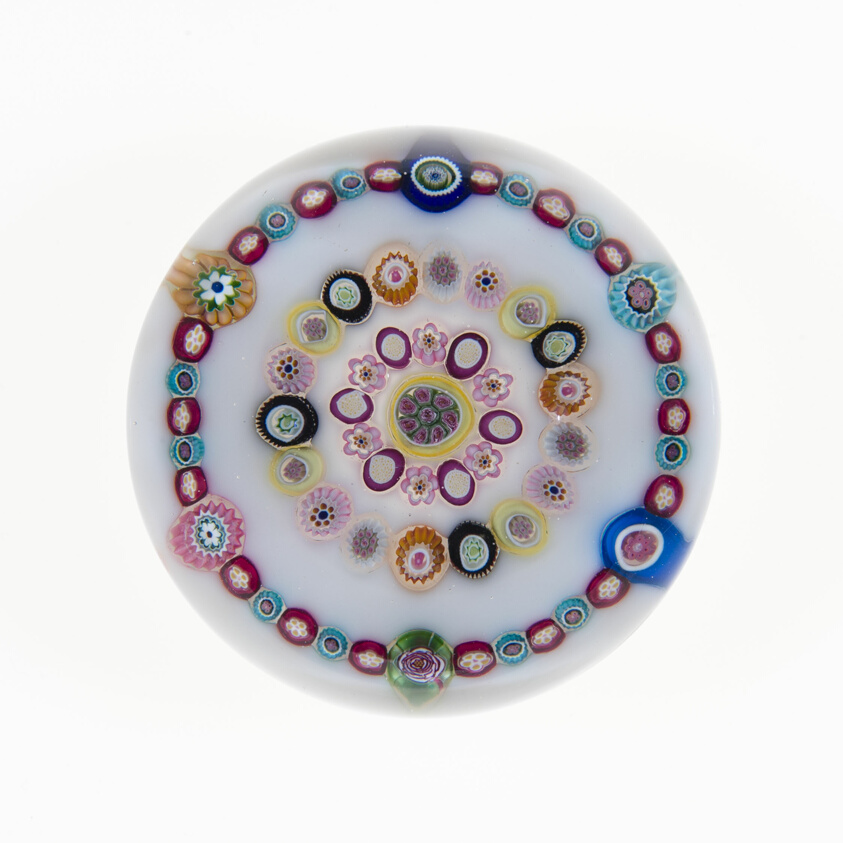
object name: Glass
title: Paperweight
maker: Clichy Glassworks (Cristalleries de Clichy); Clichy, France, 1837-1885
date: 19th century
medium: Glass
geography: Clichy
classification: paperweight; millefiori; european decorative arts; glass